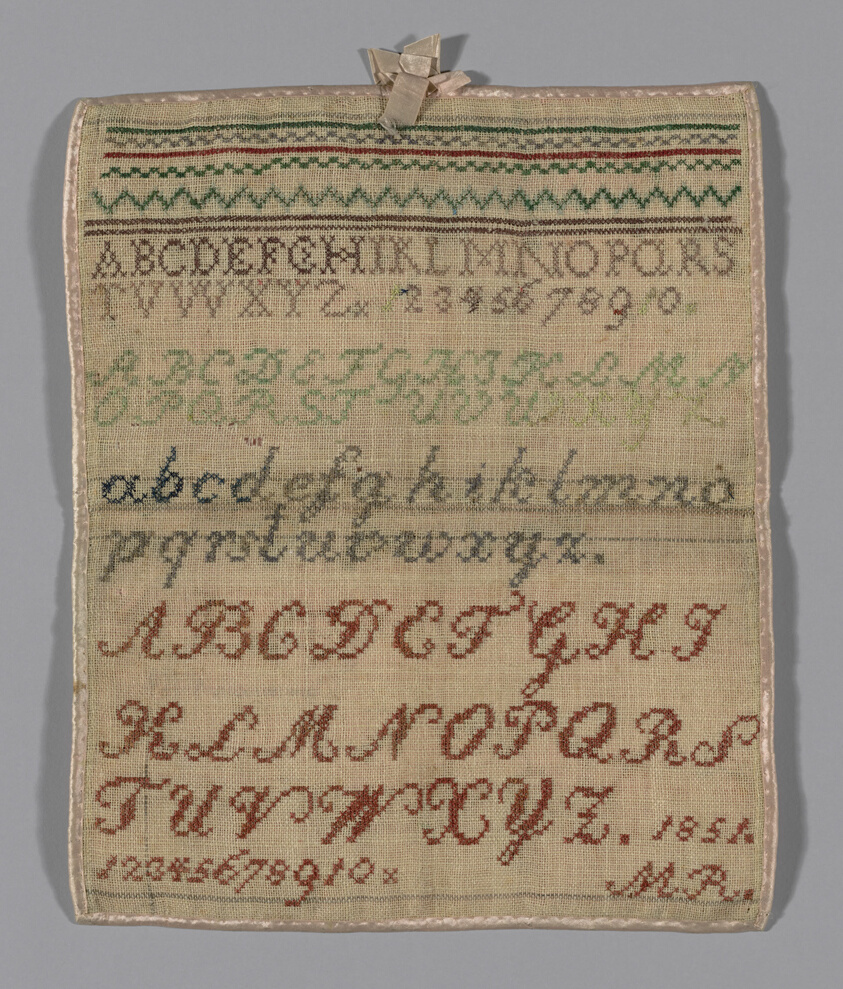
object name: Textile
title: Sampler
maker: Germany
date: 1851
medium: Linen, plain weave; embroidered with silk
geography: Germany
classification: textile; needlework (visual works); sampler